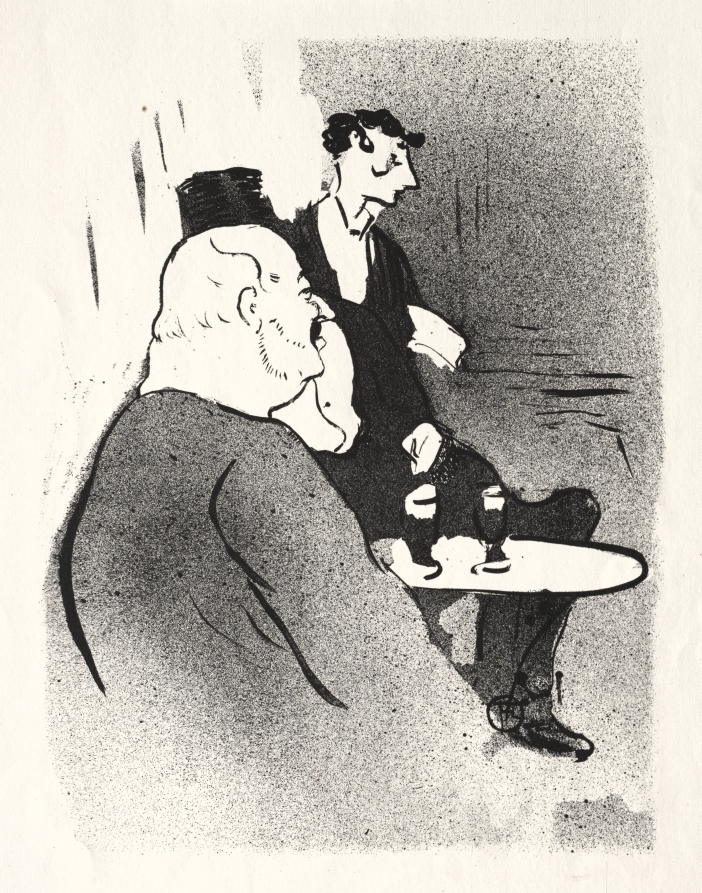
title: Ducarre aux ambassadeurs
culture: France, 19th century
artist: Henri de Toulouse-Lautrec (French, 1864–1901)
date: 1893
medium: lithograph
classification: Print